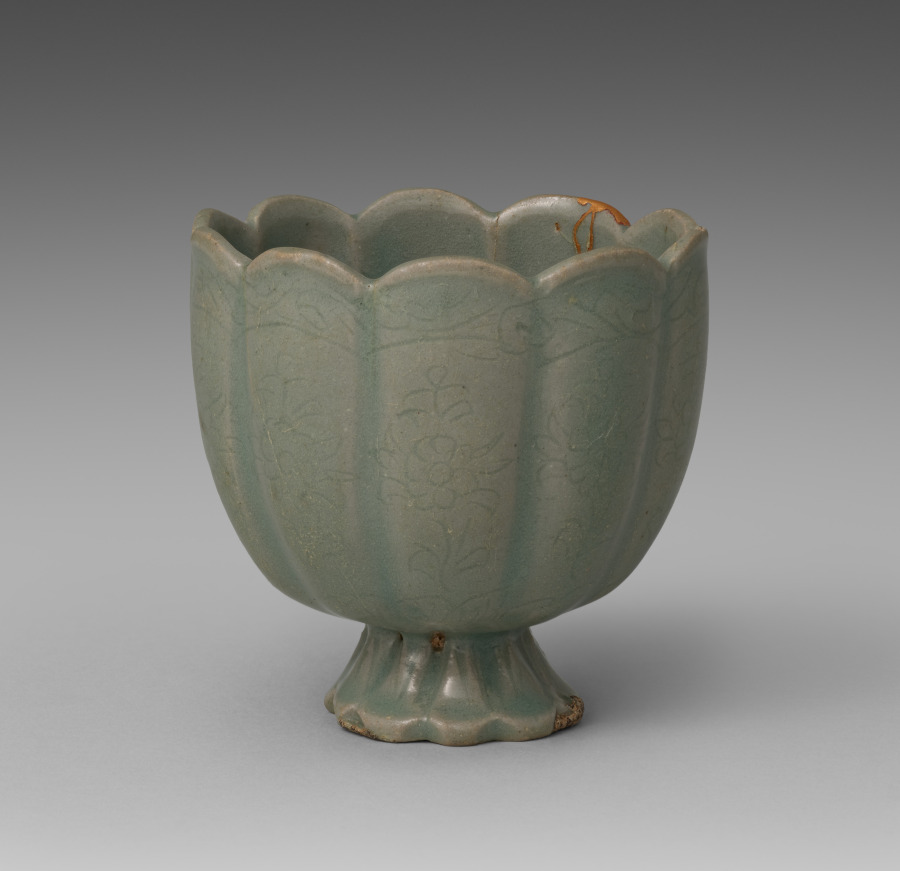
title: Floral-shaped Cup with Incised Chrysanthemum Design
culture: Korea, Goryeo dynasty (918–1392)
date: 1100s-1200s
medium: celadon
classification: Ceramic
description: Both everyday objects and ornaments such as this drinking cup were standard for Goryeo period (918–1392) burial goods. Furnishing tombs with an elaborate assemblage of objects was believed to honor and comfort the newly dead. While greenish celadon works were mainstream during the Goryeo period, bluish-white ceramic works made of white clay such as this one were produced from time to time.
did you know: Called kintsugi (literally meaning “gold joinery”) in Japanese, this method of repairing broken parts with glittering gold mixed with lacquer was extensively used for ceramic works in the Goryeo period, such as this cup.